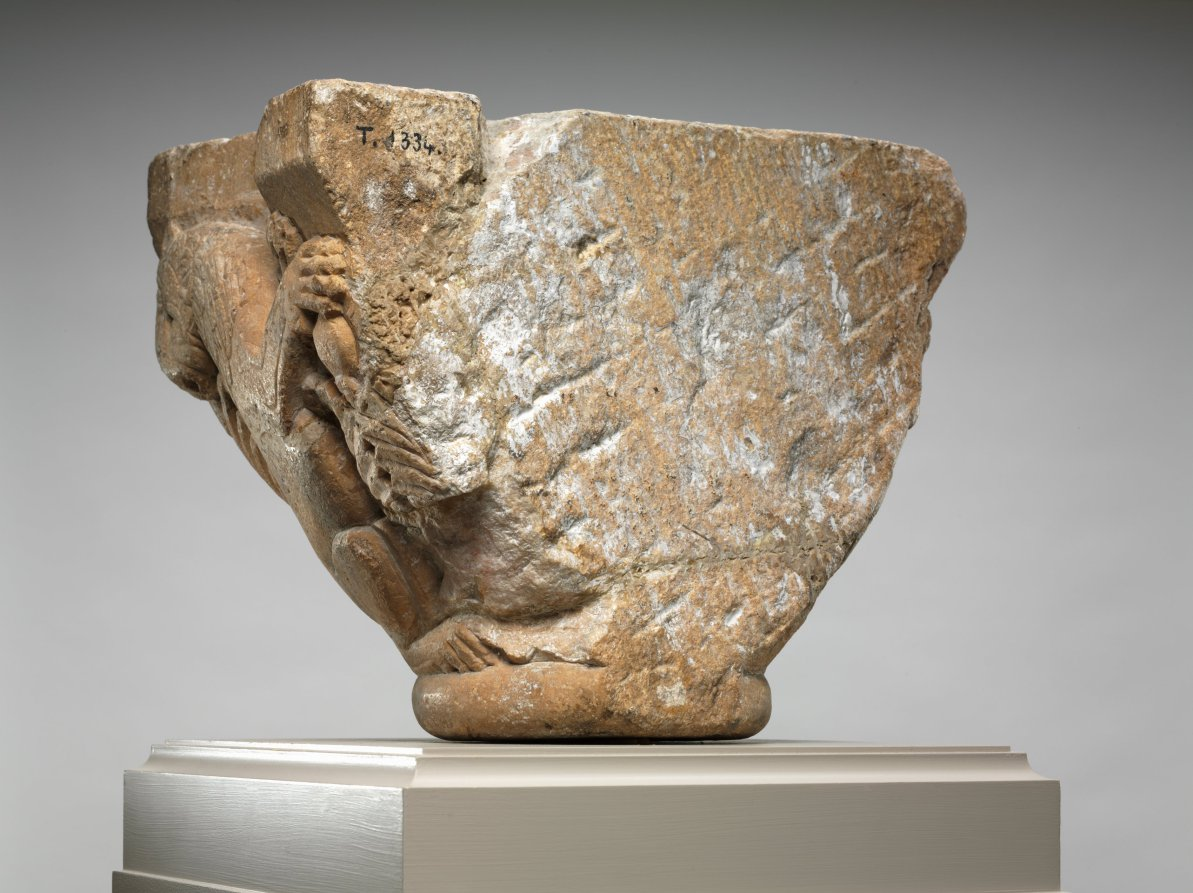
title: Engaged Capital with Lions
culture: Northern Spain (Navarre ?) or Southwest France (Pyrénées or Roussillon ?), mid-12th century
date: 1145–64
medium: marble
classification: Sculpture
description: The compositional motif of confronted and addorsed beasts illustrated on this capital was especially popular in churches along the pilgrimage roads.